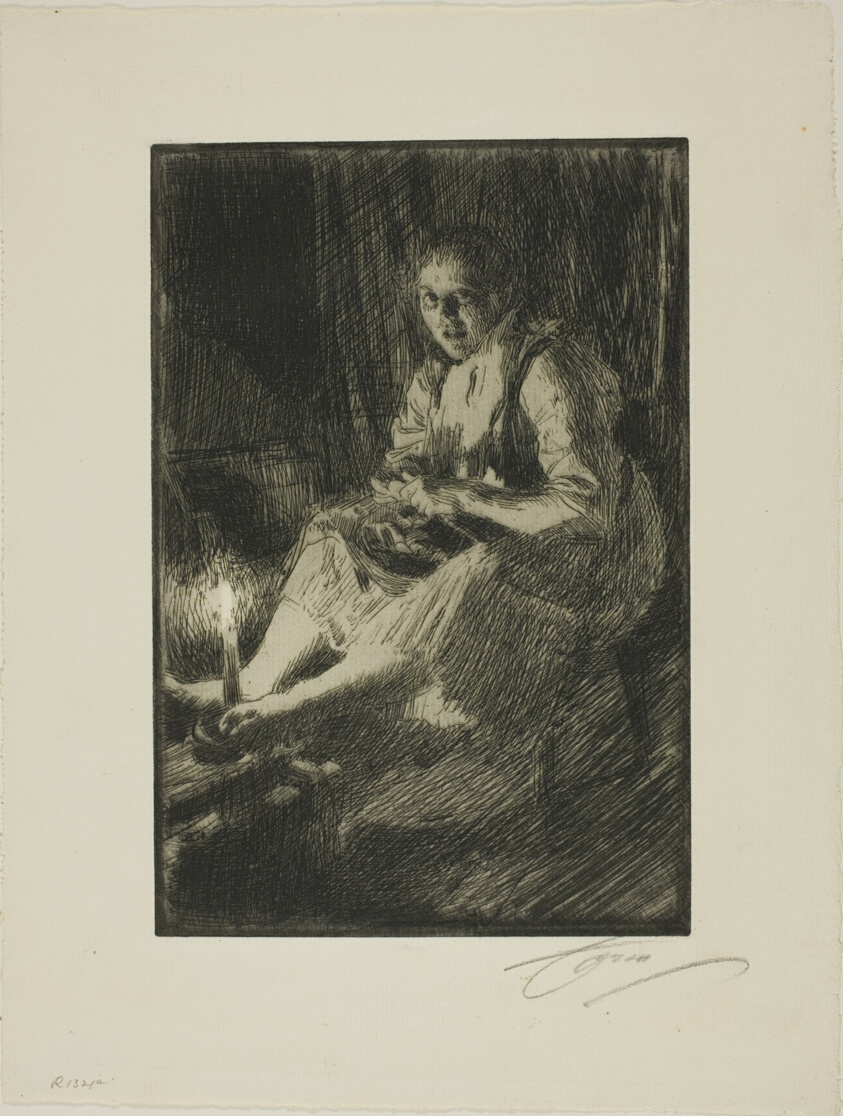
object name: Print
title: Ida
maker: Anders Zorn (Swedish, 1860-1920)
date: 1905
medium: Etching on ivory laid paper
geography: Sweden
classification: etching; print; prints and drawing